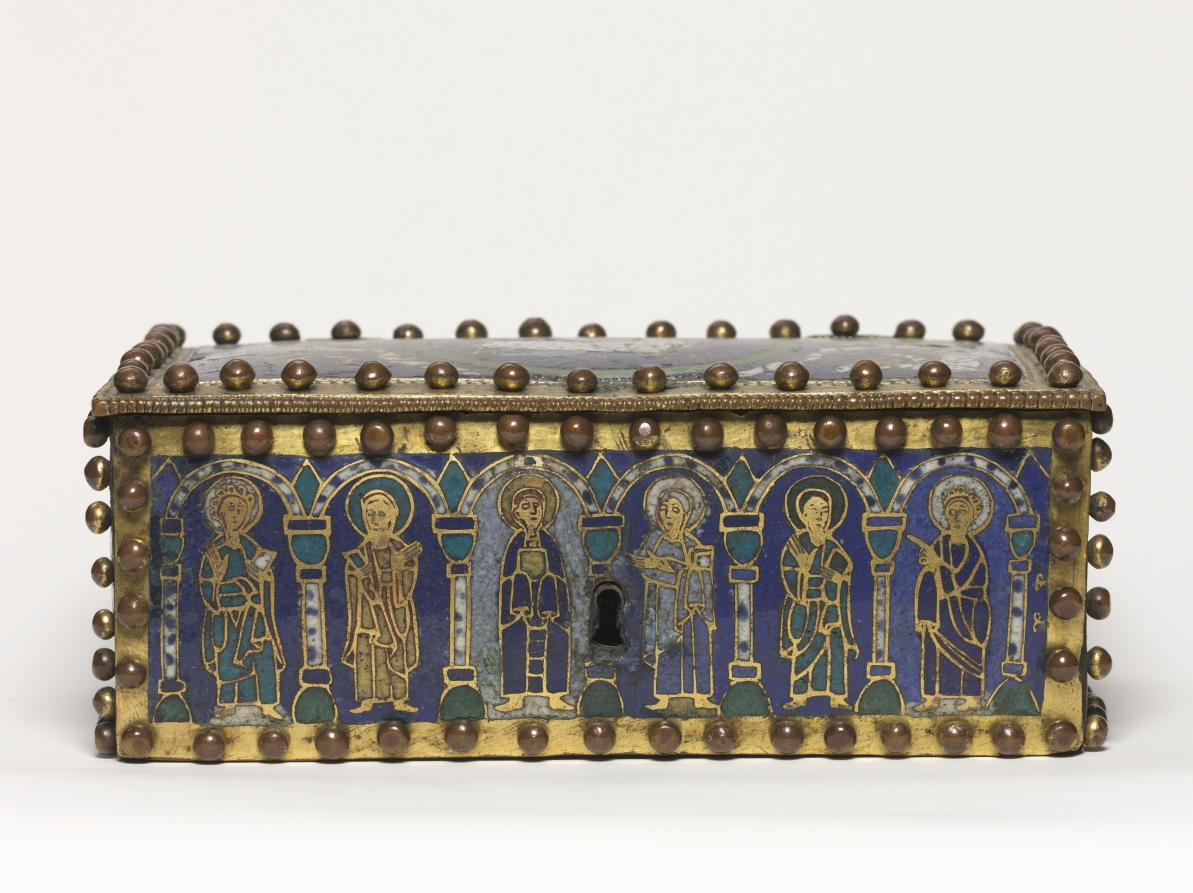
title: Casket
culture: Northern Germany?, Romanesque period, 12th century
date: 1100–1150?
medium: gilded copper, champlevé enamel, wood core (modern)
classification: Enamel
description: This champlevé enamel casket belongs to a distinct group of nine closely related objects characterized by the vivid colors of their enamel decoration and rows of spherical pins placed along the edges of each enamel plaque. Recent X-ray analysis suggests that the casket originally functioned as a stand for an altar cross. Such a function is attested to in at least three related caskets (in Copenhagen, Hildesheim, and Berlin). The casket’s iconographic program features the 12 apostles, placed under arcades (on the long sides), the Crucifixion and Christ in Majesty (on the short sides), and the Lamb of God surrounded by the symbols of the four Evangelists (on the lid).